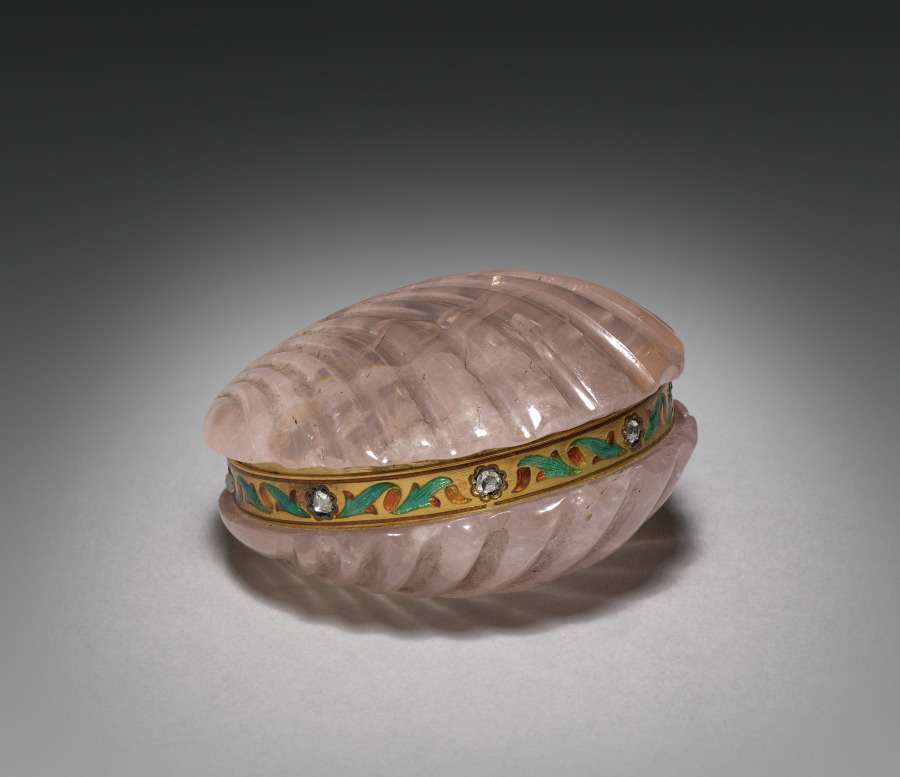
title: Shell-Shaped Box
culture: Italy (?), 19th century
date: late 1800s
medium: pink quartz, gold, enamel, diamonds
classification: Stone